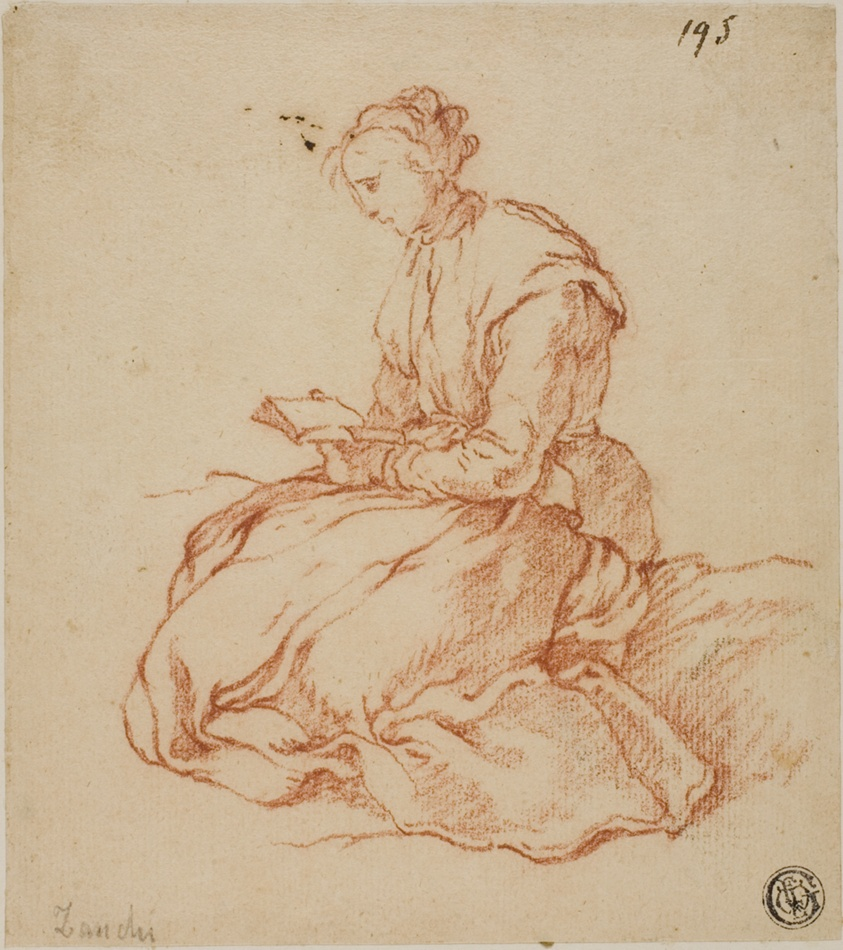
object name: Drawing and Watercolor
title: Seated Woman Reading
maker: François Boucher (French, 1703-1770); or Antonio Zanchi (Italian, 1631-1722); or possibly after Abraham Bloemaert (Dutch, 1566-1651)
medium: Red chalk on cream laid paper, laid down on ivory wove card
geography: France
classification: chalk; paper; drawings (visual works); prints and drawing